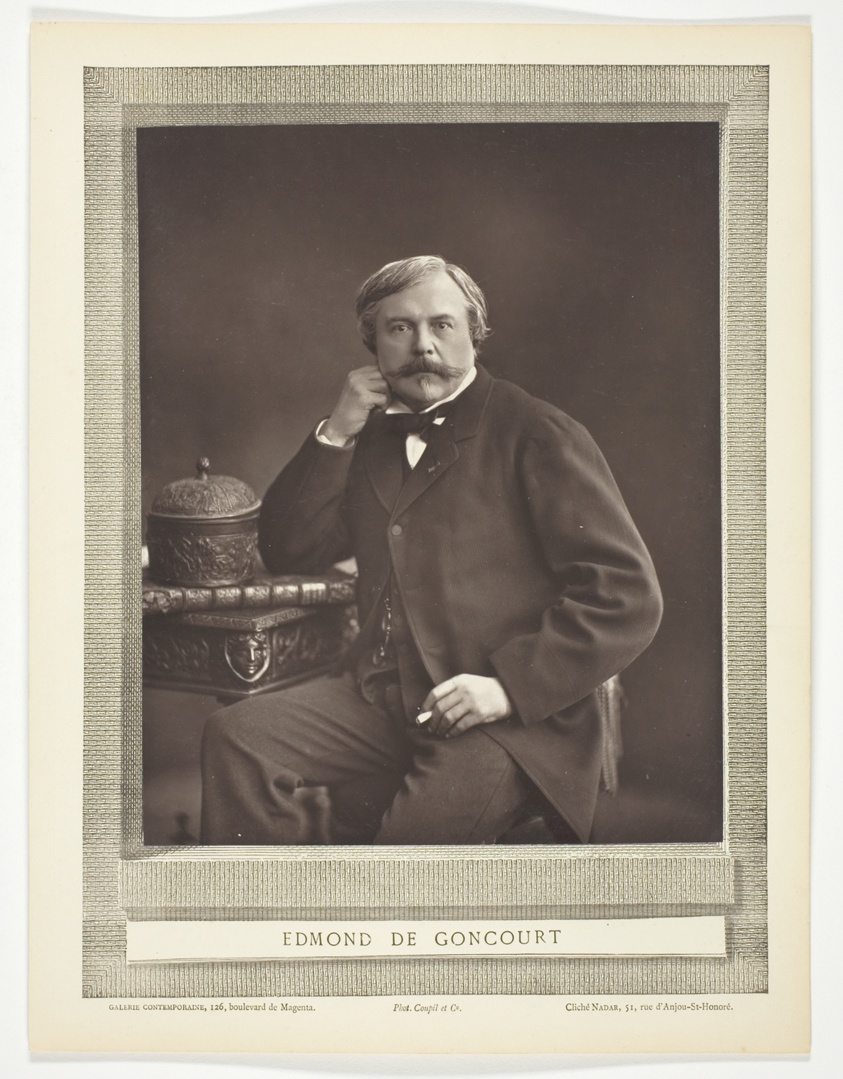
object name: Photograph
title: Edmond de Goncourt (French writer and critic, 1822-1896)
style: 19th century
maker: Nadar (Gaspard Félix Tournachon) (French, 1820–1910)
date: c. 1853/76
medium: Woodburytype, from the periodical “Galerie Contemporaine Littéraire, Artistique” (1876), volume 3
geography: France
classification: woodburytype; photomechanical process; photography; photograph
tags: Collected by Hugh Edwards, Contemporaine Littéraire